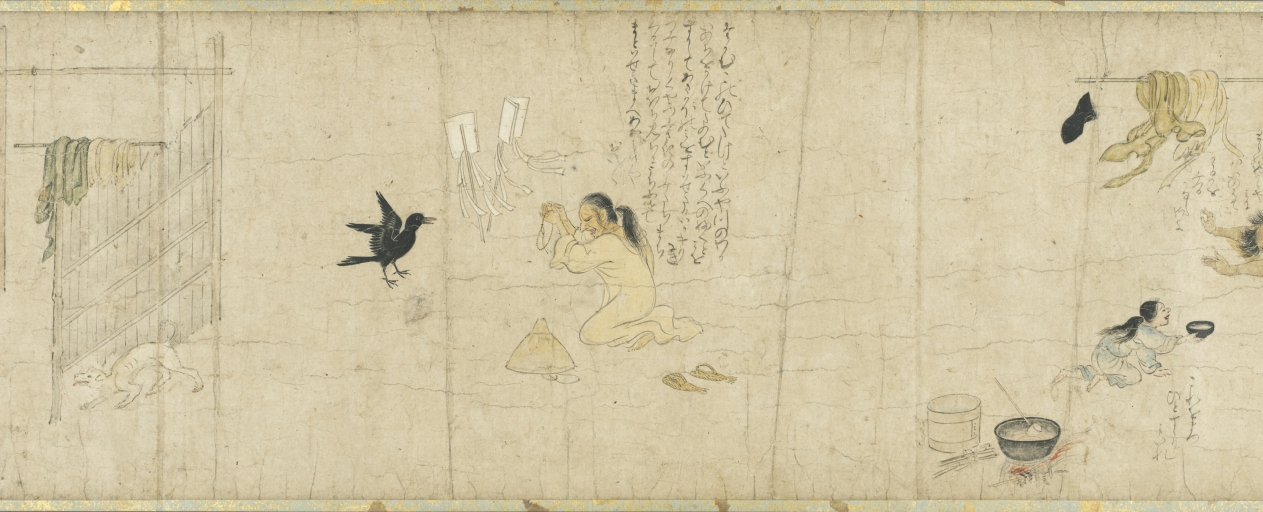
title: The Story of Fukutomi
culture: Japan, Muromachi period (1392–1573)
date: mid-1400s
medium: Handscroll; ink and color on paper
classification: Painting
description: This handscroll shows the second half of an odd tale in which a ne’er-do-well seeks the path to quick fortune and learns the art of musical flatulence. Prior to a major performance, a mentor (and competitor) advises him to consume morning glory seeds, a laxative. Thus, while performing he fouls himself and ends his days in humiliation. The audacious nature of this story and its presentation—well-animated figures with dialogue adjacent to the appropriate moments of action—create a primitive graphic novel. Japanese visual humor about farting preceded this story, but the satirical, mean-spirited twist in this tale suggests its intent was not merely to be humorous. The story was likely commissioned by court officials who disapproved of common performers rising to high positions, outflanking what was the accepted social order.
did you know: This scroll is treasured as the second oldest surviving version of this story.